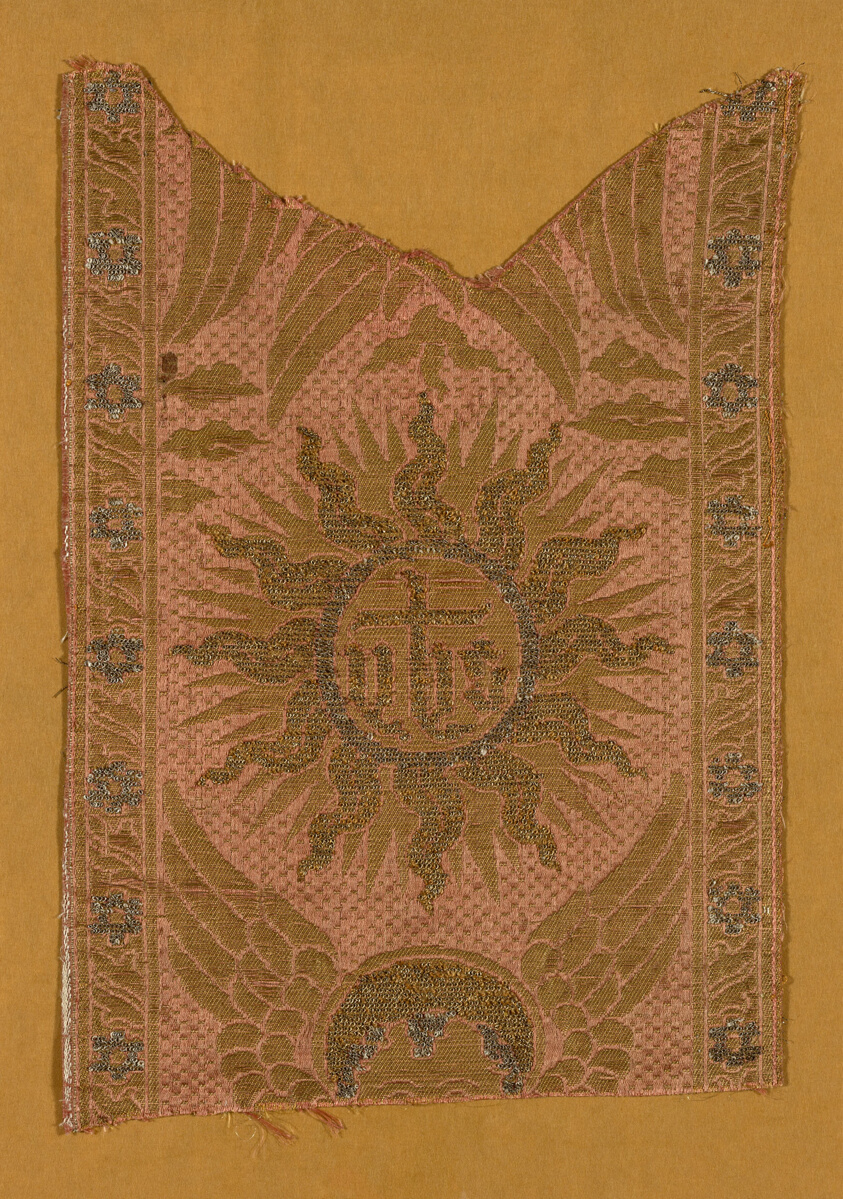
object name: Religious/Ritual Object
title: Fragment (From an Orphrey Band)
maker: Italy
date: 15th century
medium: Silk, gold, and silver gilt strips wound around silk fiber core and gold wire, integrated compound-weave of warp-float faced satin weave and twill weave with supplementary patterning and brocading wefts forming weft loops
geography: Italy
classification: textile; weaving; liturgical; ritual objects